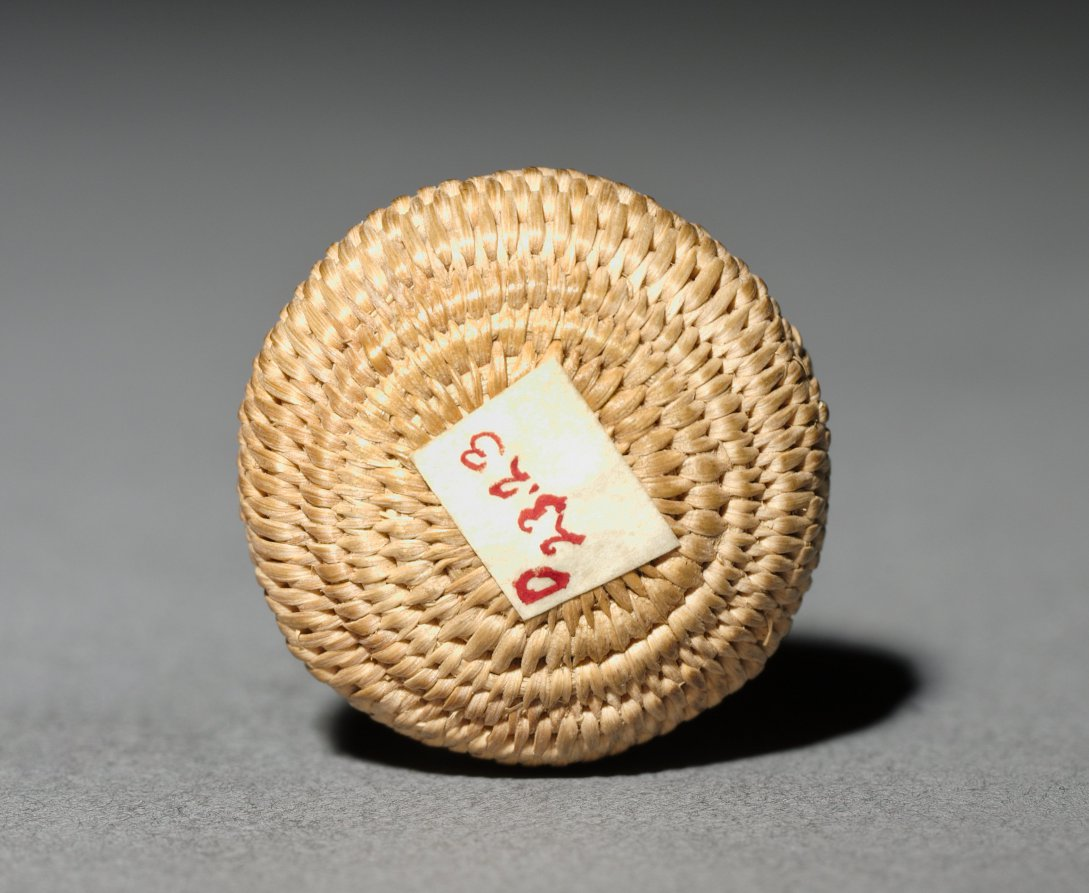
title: Miniature Basket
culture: America, Native North American, Southwest, Arizona, Akimel O'odham (Pima), Unassigned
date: before 1923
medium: plant fiber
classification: Basketry